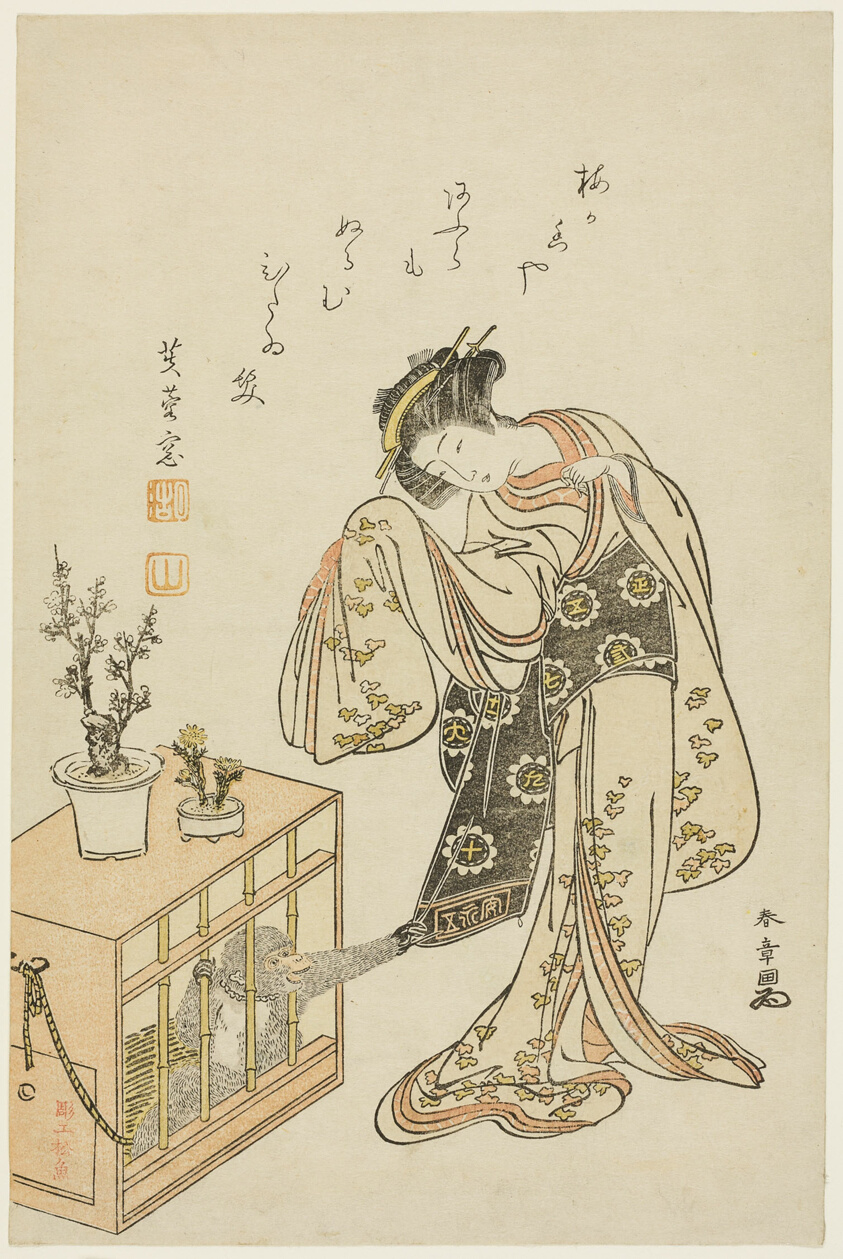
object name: Print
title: Young Woman with a Caged Monkey (Calendar Print for New Year 1776)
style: Japanese (culture or style)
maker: Katsukawa Shunsho 勝川 春章; Japanese, 1726-1792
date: 1776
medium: Color woodblock print; chuban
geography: Japan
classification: woodblock print; print; asian art